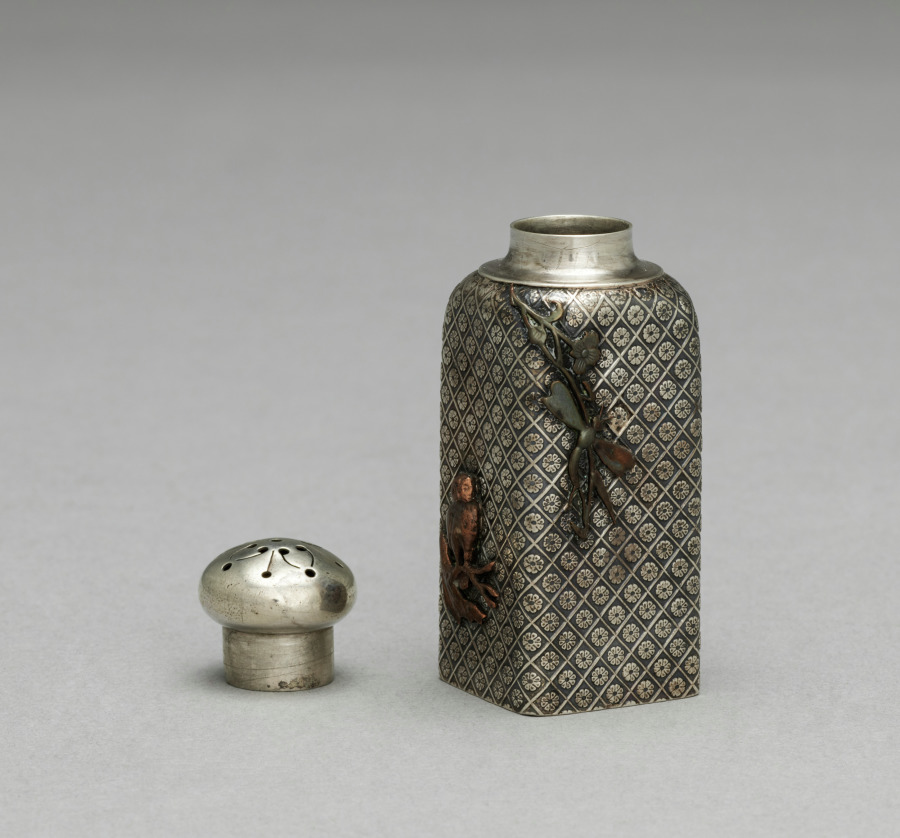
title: Pepper Shaker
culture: America, Rhode Island, Providence, 19th century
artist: Gorham Manufacturing Company (America, est. 1831)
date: c.1875–1885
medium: silver and mixed metals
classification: Silver